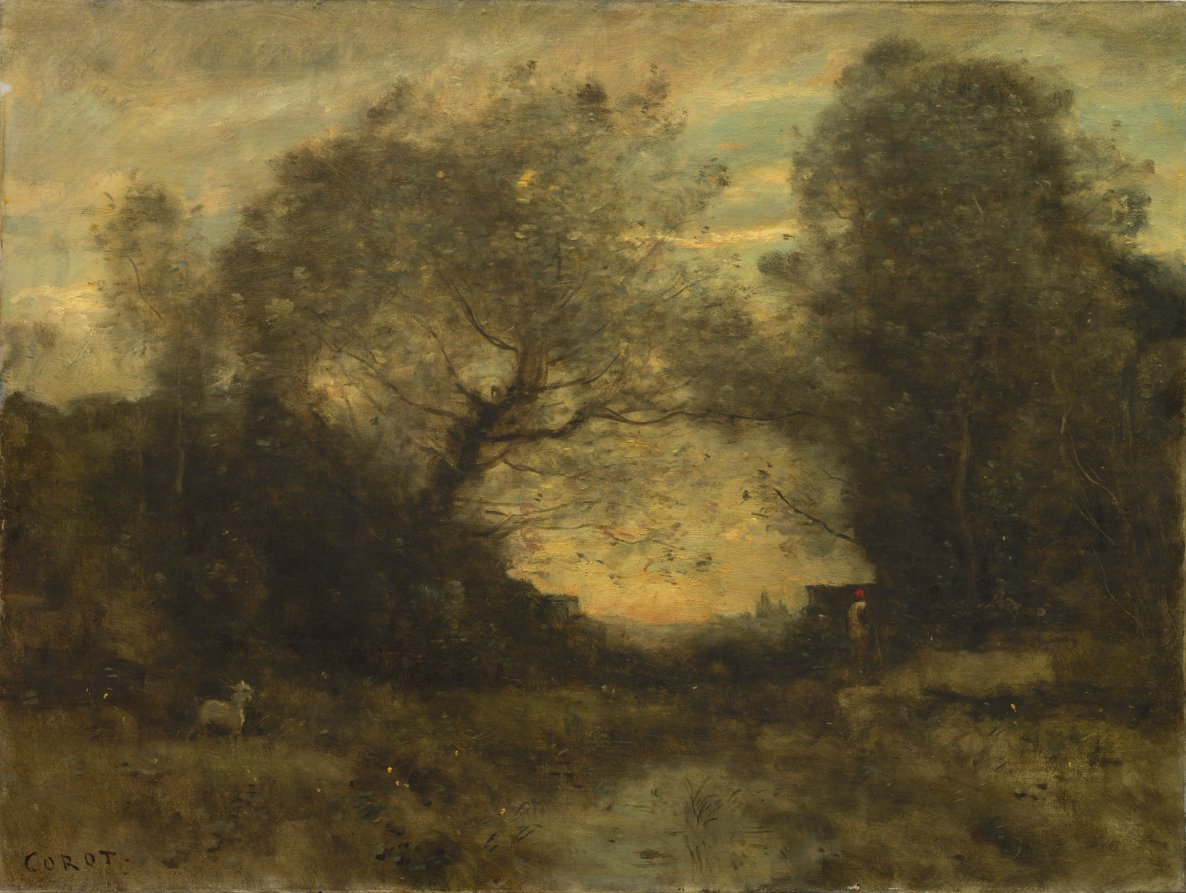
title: The Pond at the Entrance of the Woods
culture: France, 19th century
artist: Jean Baptiste Camille Corot (French, 1796–1875)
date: c. 1860–75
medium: oil on fabric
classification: Painting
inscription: Signed lower left in dark brown paint: corot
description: This scene of a pond bordered by large, leafy trees echoes Corot's well-known views of Ville-d'Avray, while the vaporous light and atmospheric effects within a restricted palette resemble those of the artist's late style of the 1860s and 1870s. The small forms of the peasant and white goat are also typical of Corot's late imagery. This is one of many views of a large pond at Ville-d'Avray, a small commune on the western suburbs of Paris, where Corot inherited a rural property from his parents.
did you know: This painting's first recorded owner was the Dowager Duchess of Newcastle, née Henrietta-Adela Hope, who became a widow of the sixth duke Henry Pelham Alexander in 1879.